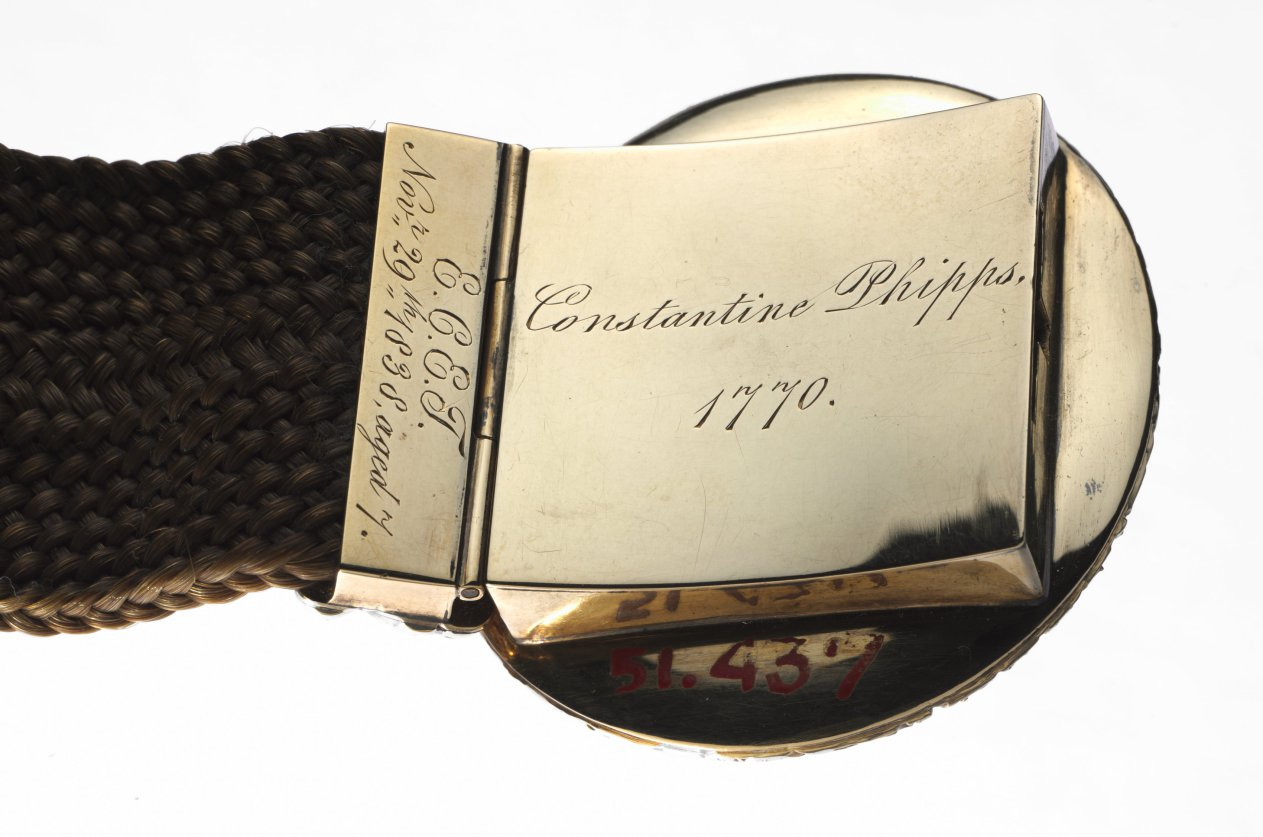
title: Portrait of Constantine Phipps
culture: England, 18th century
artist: John I Smart (British, 1741–1811)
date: 1770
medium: watercolor on ivory in a later gold and woven hair bracelet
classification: Portrait Miniature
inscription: signed lower left: J.S. / 1770.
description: John Smart painted the British gentleman Constantine Phipps (1746–1797) at the age of twenty-four, executing this portrait in 1770, the year following the death of the sitter’s father, Constantine Phipps (1710?–1769), and preceding his marriage to Elizabeth Tierney (d. 1832). Phipps the younger was the second son of a landowner and lived throughout England and France. In 1788 he moved his family to Caen, Normandy, hoping to educate his ten (eventually thirteen) children more economically. Phipps and his wife returned to England in 1792 to attend their daughter’s wedding. The escalating conflict between France and England prevented Phipps from returning to France where he had left eight children behind. Unfortunately, he did not see them before his death five years later. The portrait represents Phipps’s nearly full face. He has light brown eyes and natural brown hair worn en queue. He wears a green coat with a small collar, a white waistcoat embroidered with gold, and a high, white stock collar. Phipps is depicted against an olive-gray background. This early work by Smart already exhibits hallmarks of the artist’s style, such as the plain, gray background, the sitter’s colorful clothing, and his expressive eyes and slightly upturned mouth, which suggest that Phipps was a self-assured man with a sense of humor. The small format is also characteristic of the first decade of Smart’s career. This miniature is mounted in an elaborately carved gold frame on a bracelet made of gold and woven light brown human hair. The bracelet was executed later than the miniature and is in the style of the 1830s or 1840s. The inscription on the clasp reads “E. C. E. T. / Nov.r 29th 1838, aged 7” and may indicate that this bracelet was given to Constantine’s great-granddaughter Elizabeth Clarissa Emilie Toker (1831–1888) on her seventh birthday possibly by her mother or grandmother. There is a variant of this work in the Phipps collection in London. Painted in 1771, this miniature descended from Colonel Pownoll Phipps, the seventh child of Constantine Phipps, to John Constantine Phipps.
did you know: This miniature is mounted to a bracelet that was made at least 50 years later.